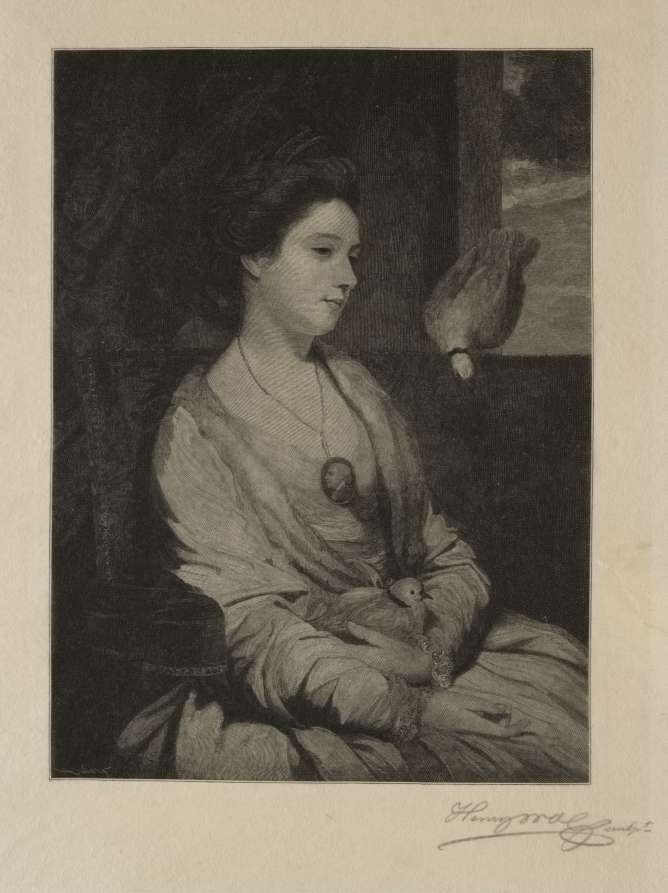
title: Girl with Doves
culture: America, late 19th-early 20th century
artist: Henry Wolf (American, 1852–1916)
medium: wood engraving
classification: Print